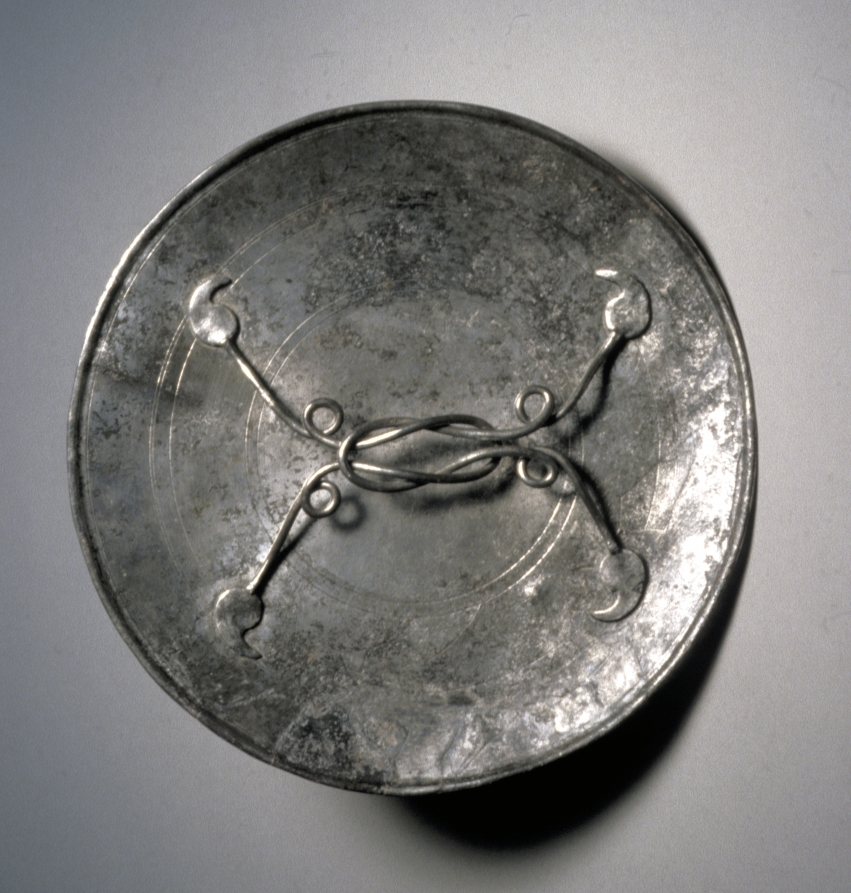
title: Mirror with a Handle in the Form of a Herakles Knot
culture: Byzantium, Syria(?), Byzantine period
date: c. 280–400 CE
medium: silver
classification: Metalwork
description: This type of mirror was introduced throughout the Roman Empire by the 2nd century and remained popular into the 3rd and 4th centuries. Similar examples have been found in Germany and Britain. The handle is made of two thick pieces of silver wire, intertwined to form a Herakles knot--a knot so complex that only someone as strong as Herakles could break it. In antiquity, knots of various kinds were believed to provide protection from harm.